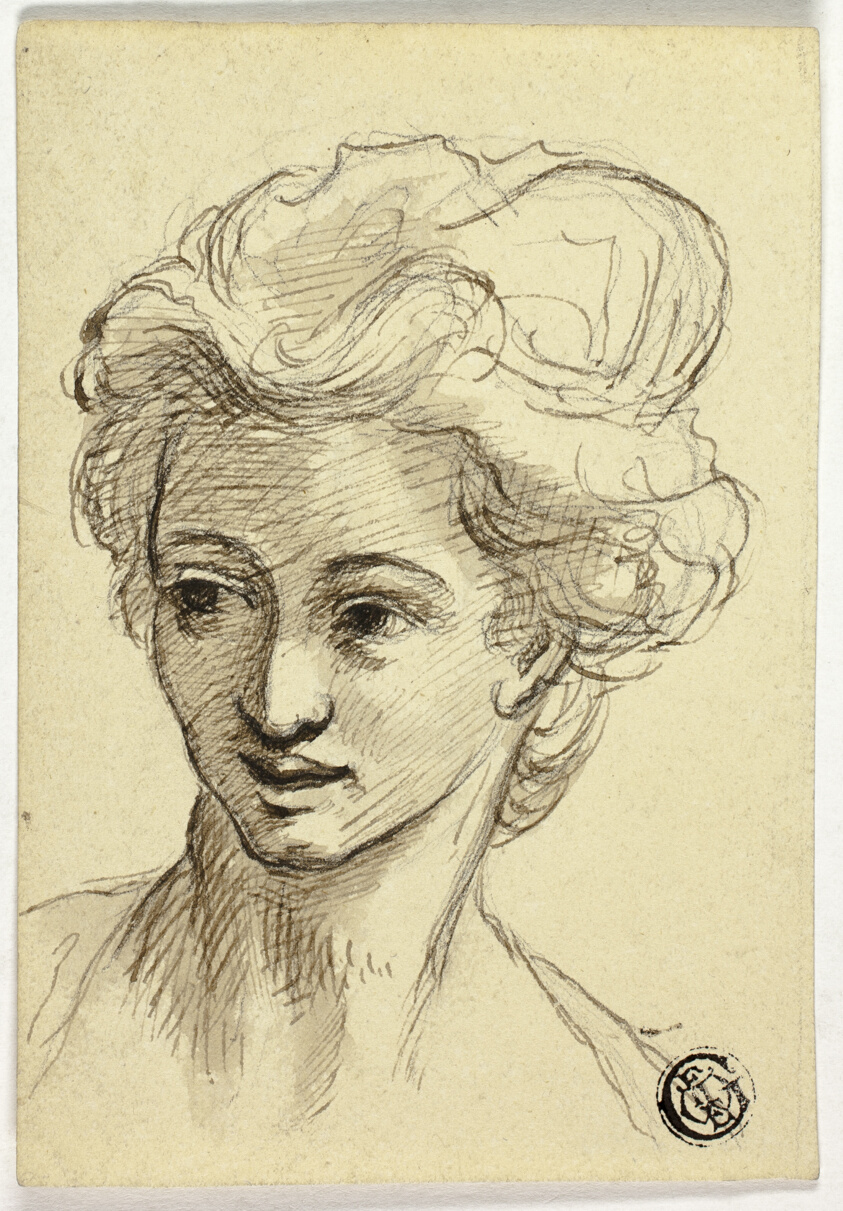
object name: Drawing and Watercolor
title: Head of Woman, Turning Left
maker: Style of Angelica Kauffmann (Swiss, 1741-1807)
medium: Pen and brown ink, with brush and brown wash and graphite, on cream wove paper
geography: Switzerland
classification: pen and ink drawings; drawings (visual works); prints and drawing